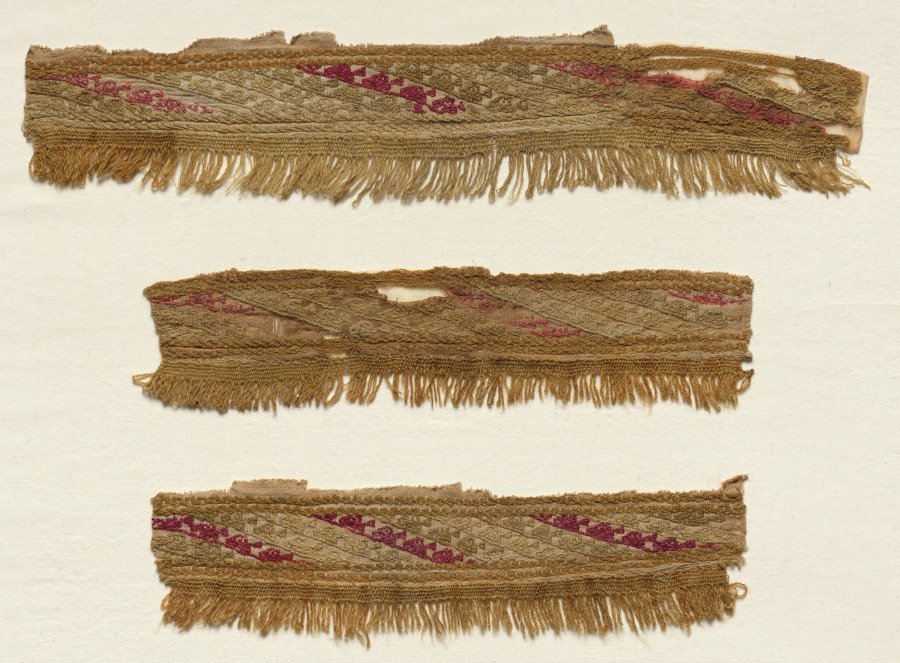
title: Three Border Fragments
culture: Peru, Central Coast, Chancay, 12th-15th century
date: c. 1100–1400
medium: tabby, brocaded; cotton and wool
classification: Textile